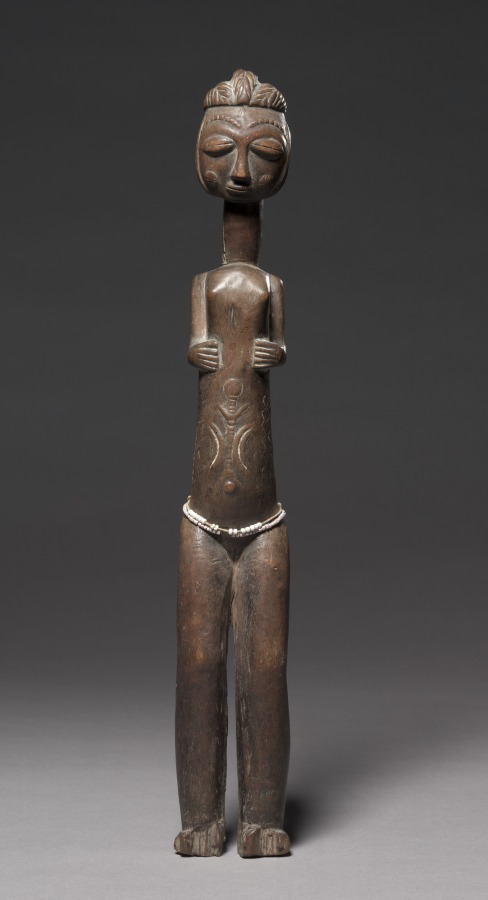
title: Female Figure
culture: Africa, West Africa, Côte d'Ivoire, possibly Bondoukou region, unknown maker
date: late 1800s–early 1900s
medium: Wood, paint, glass beads, and natural fiber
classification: Sculpture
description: An artistic melting pot, the Bondoukou region in northeastern Côte d’Ivoire near the border with Ghana is inhabited by several ethnic groups whose cultures and artistic styles often intermingle. This figure’s rounded shapes and delicate surface decoration––which seem to imitate body scarifications––closely resemble the style of Baule carvings. The figure’s meaning and function remain a mystery.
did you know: Artworks from different regions traveled across Africa; while found in Wenchi, Ghana, this figure was made in nearby Côte d'Ivoire.